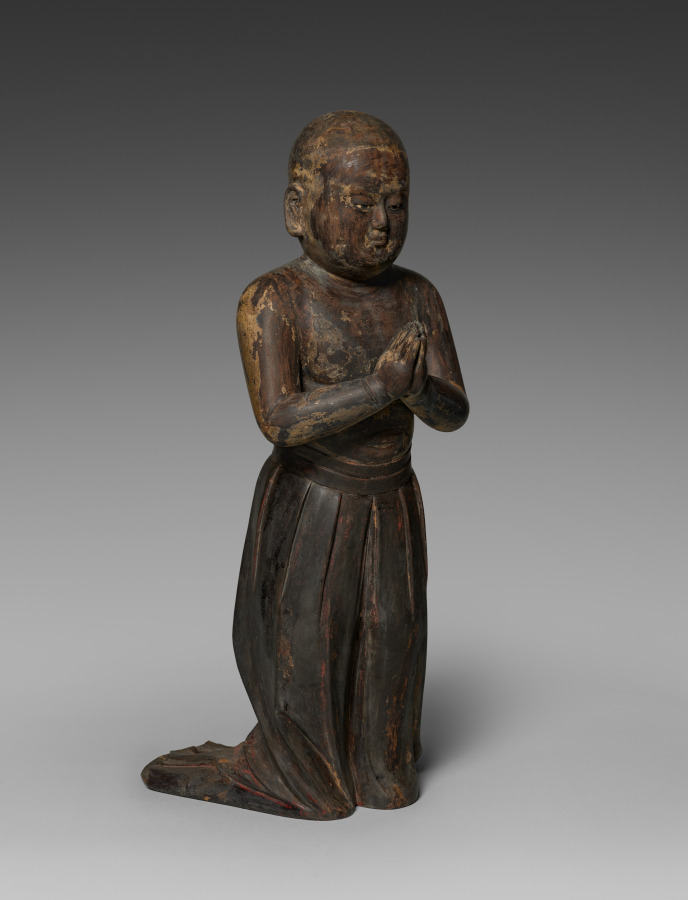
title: Prince Shōtoku at Age Two (Shōtoku Taishi)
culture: Japan, Kamakura period (1185–1333)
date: early 1300s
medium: Wood with lacquer, color, and rock-crystal inlaid eyes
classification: Sculpture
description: Two-year old Prince Shōtoku (573?–622?) places his palms together in a gesture called gasshō. Shōtoku played a major role in the introduction of Buddhism to Japan, and devotees of the prince commissioned painted and sculpted images commemorating important moments of his life. At age two, the prince faced east and chanted the name of the Buddha without having been taught the practice. This sculpture captures the fantastic event foreshadowing his future acts.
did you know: Shōtoku Taishi had several titles. One translates to "the prince of the stable door" because he was said to have been born in the imperial stables.